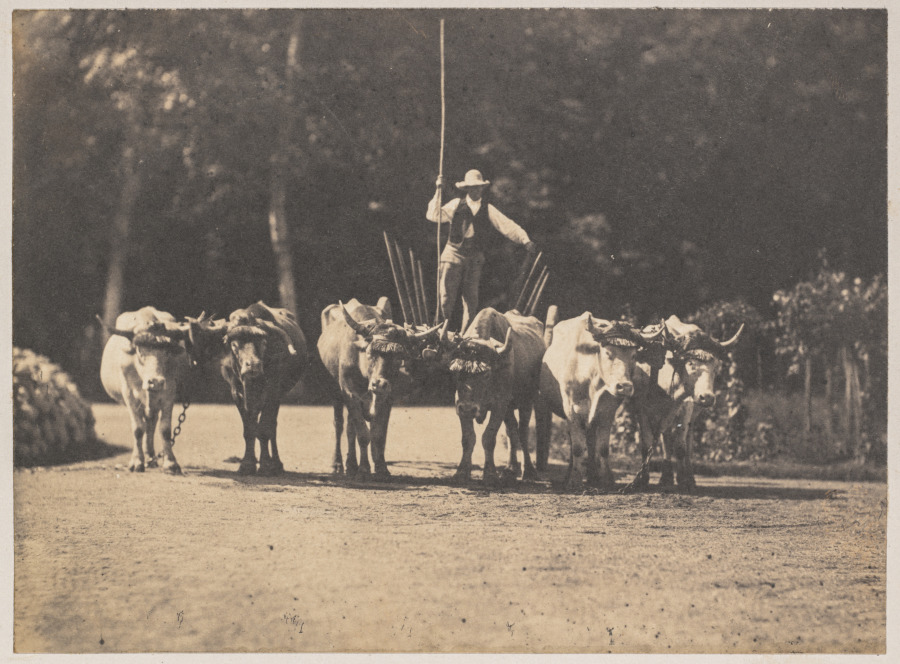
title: Six Oxen Team with their Driver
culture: France, 19th century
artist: Olympe Aguado (French, 1827–1894)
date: c. 1853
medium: salt print from wet collodion negative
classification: Photograph